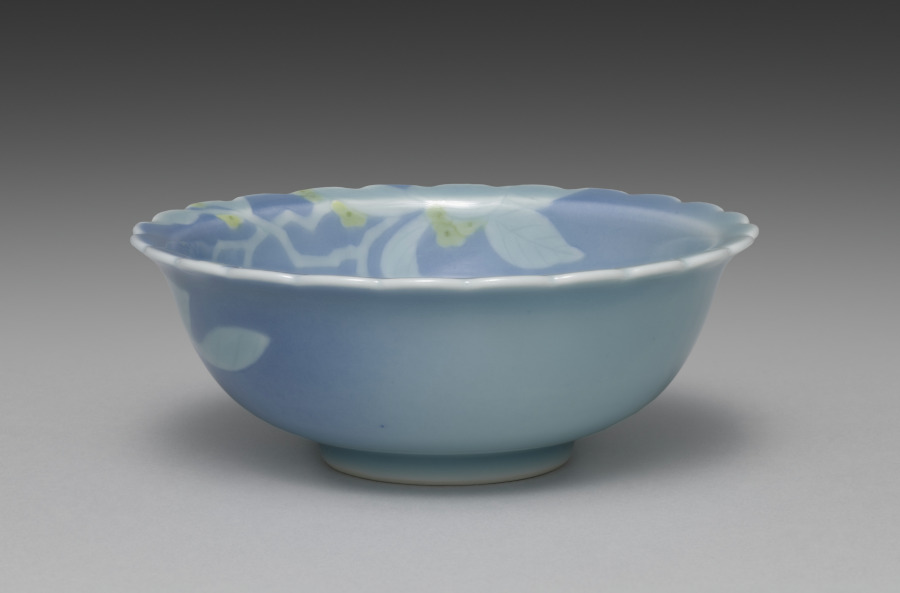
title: Dish from Dishes with Flowers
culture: Japan, Taishō period (1912–26) or Shōwa period (1926–89)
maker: Seifū Yohei IV (Japanese, 1872–1951)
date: 1914–46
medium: One from a set of five dishes; porcelain with underglaze yellow and blue glaze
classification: Ceramic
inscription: 清風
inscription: 清風造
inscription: 成山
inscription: 清風盧人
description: One can imagine a cool summer breeze when looking at this set of dishes, each shaped with a crenulated mouth and glazed with blue. Around the rim and into the basin, the bowls have low-relief designs of flowers with underglaze yellow petals; their leaves and stems show white through the glaze. On each dish, the design continues over the rim onto one side.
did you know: Seifū Yohei IV’s dishes with flowers feature underglaze yellow.